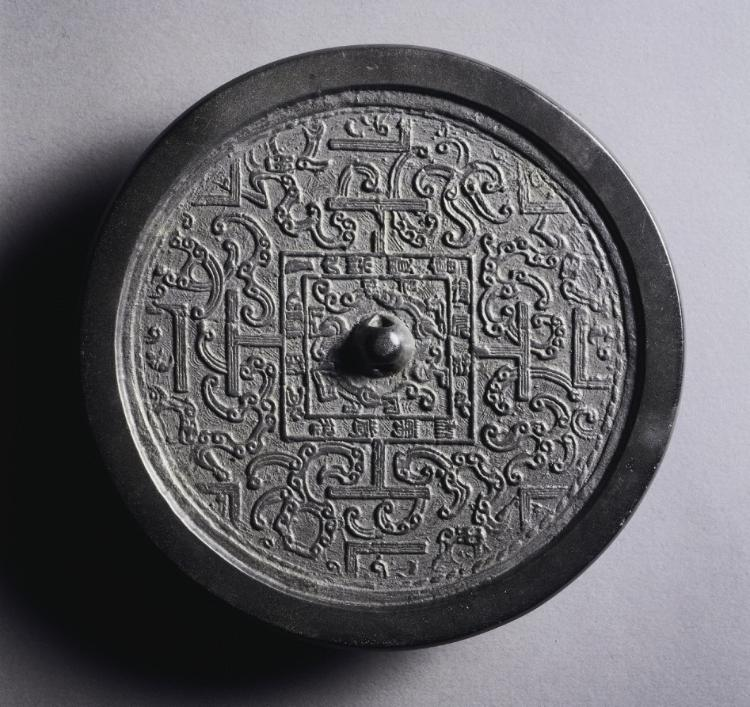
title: TLV Mirror with Serpentine Interlaces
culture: China, Western Han dynasty (206 BCE–8 CE)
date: 125–1 BCE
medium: bronze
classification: Metalwork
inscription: 大樂貴富，得所好。千秋萬歲，延年益壽。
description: Inscription: In great joy and fortune, May you obtain your heart's desire. Through thousands of autumns and myriad years, May you live a lasting life.